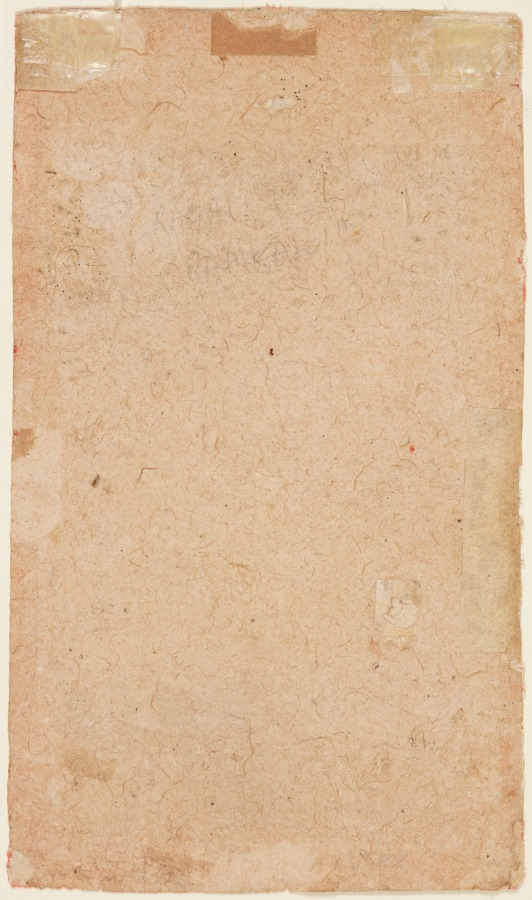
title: Lovers on a Terrace: Ramakali Ragini of Hindol, from a Bundi Ragamala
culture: Northwestern India, Rajasthan, Rajput Kingdom of Bundi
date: c. 1610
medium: gum tempera and gold on paper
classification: Painting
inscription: rāmakalī. 11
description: Sitting on a floral carpet outside a bedchamber, a noble dressed in Mughal apparel including Jahangir-period turban and decorated sash is trying to assuage his displeased consort. The lady turns her face away from the man, showing that his appeals have been ignored. The black sky indicates that their quarrel takes place in the middle of the night.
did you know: The red canopy with a yellow border above them is to be used as a fan.